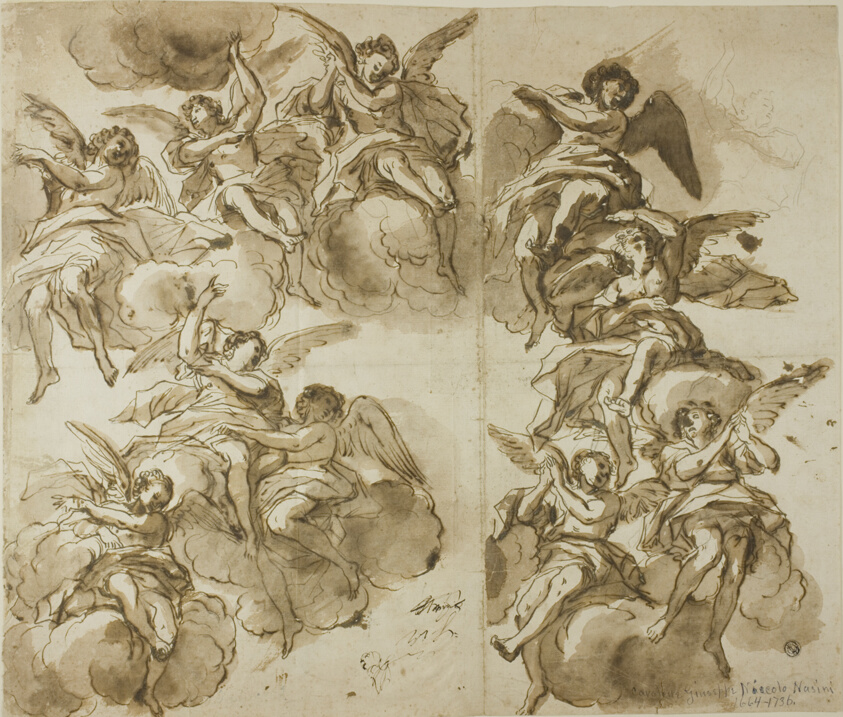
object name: Drawing and Watercolor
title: Ceiling Design: Angels (recto); Sketches of Angels (verso)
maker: Attributed to Giuseppe Nicola Nasini (Italian, 1657-1736); or the school of Luca Giordano (Italian, 1632-1705)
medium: Pen and iron gall ink, with brush and brown wash, with black chalk (recto), and red chalk and pen and brown ink (verso), on ivory laid paper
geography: Italy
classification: pen and ink drawings; drawings (visual works); prints and drawing